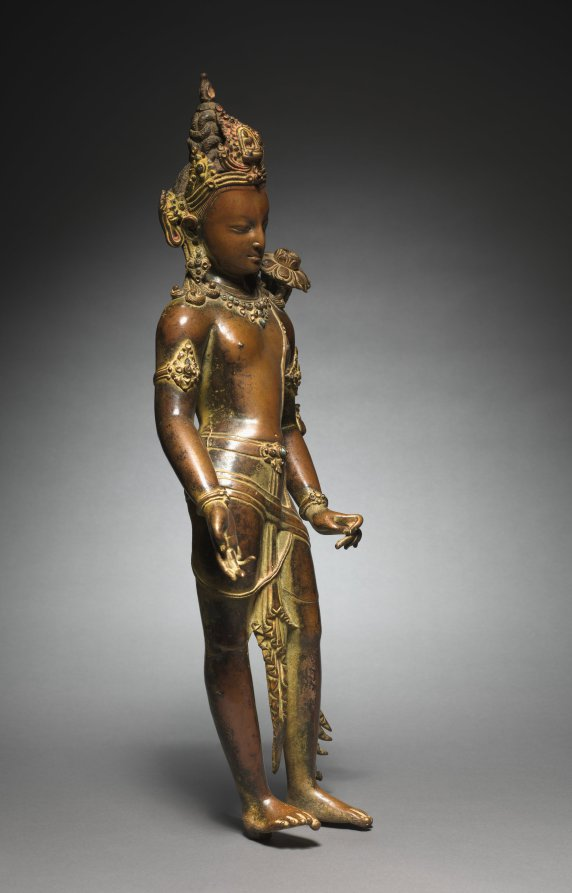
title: Avalokitesvara Padmapani: Bodhisattva of Mercy Bearing a Lotus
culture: Nepal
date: c. 1000s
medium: bronze with gilding, pigment, and semiprecious stones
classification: Sculpture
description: Venerated by Buddhists across the world as the perfect embodiment of compassion for all beings, this bodhisattva-a being only one stage away from complete enlightenment-holds his right hand out gently in the gesture of gift-giving. In his left hand, he once grasped the stem of a lotus flower that blossoms over his left shoulder, indicative of the abundant benefits that result from acts of loving kindness. All bodhisattvas wear royal garments and jewels, in reference to the historical Buddha’s early life as a prince, prior to his achievement of enlightenment through meditations in the forest. In the center of his crown is the tiny seated image of the meditating Buddha Amitabha that identifies this figure as Avalokitesvara specifically. Nepalese bronzes of the 11th century are solid cast and have an exceptionally high copper content in the alloy that makes the bronze difficult to manage during fabrication. The color achieved by the extra copper creates a distinctive warmth and softness in the sculpture. The flexed toes of the right foot and the swinging to one side of the gathered ends of his garment impart a sense of dynamism to his ongoing act of giving. His facial expression is sweet and placid but sharp, as though he is keenly aware of the sufferings of the world.